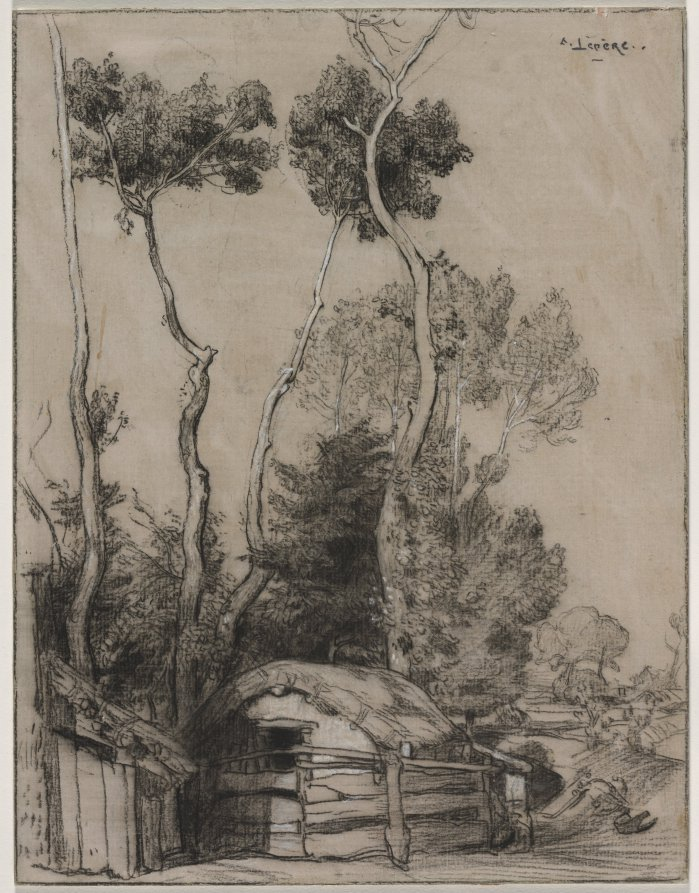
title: Landscape with Cottages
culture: France, 19th-20th century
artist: Auguste Louis Lepère (French, 1849–1918)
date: c. 1860s-1918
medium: charcoal heightened with white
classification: Drawing